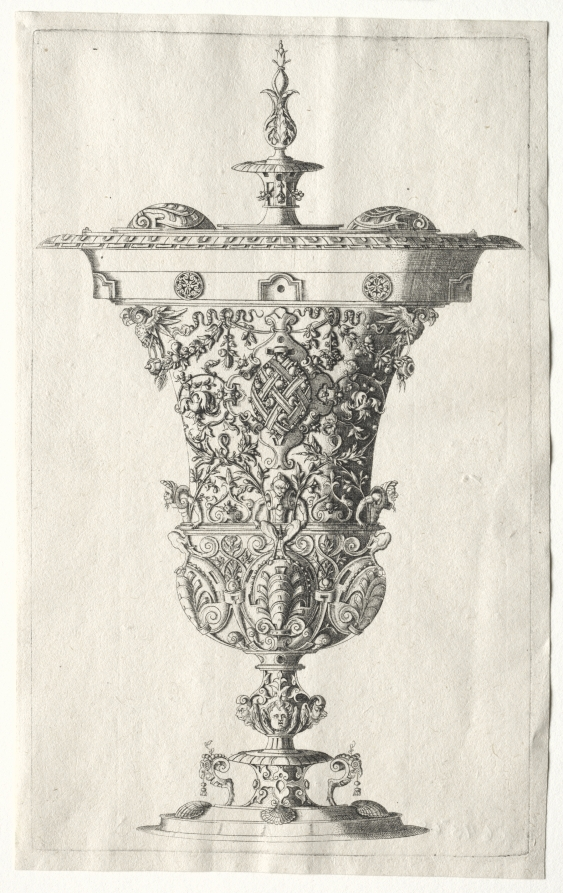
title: Ornamental Vase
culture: Germany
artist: Wenzel Jamnitzer I (German, 1508/09–1585)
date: 1500s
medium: etching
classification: Print